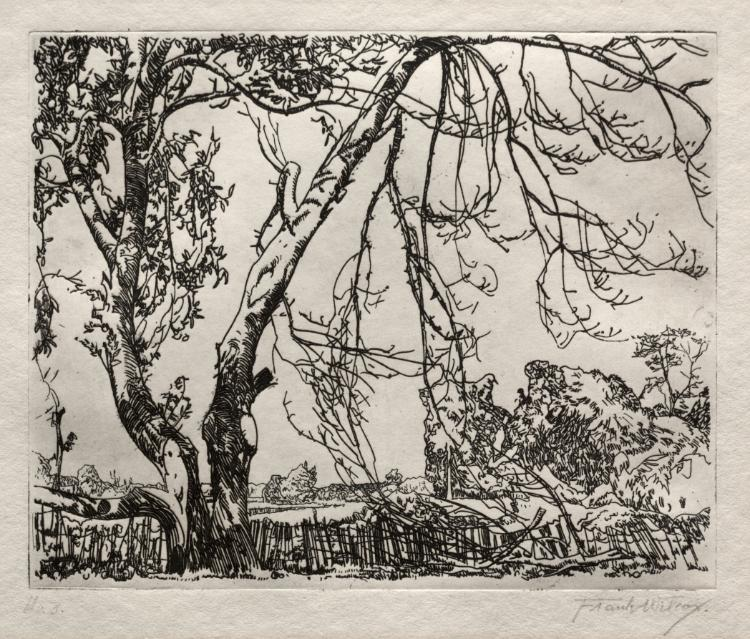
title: Apple Tree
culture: America, Ohio, Cleveland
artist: Frank Wilcox (American, 1887–1964)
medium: etching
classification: Print